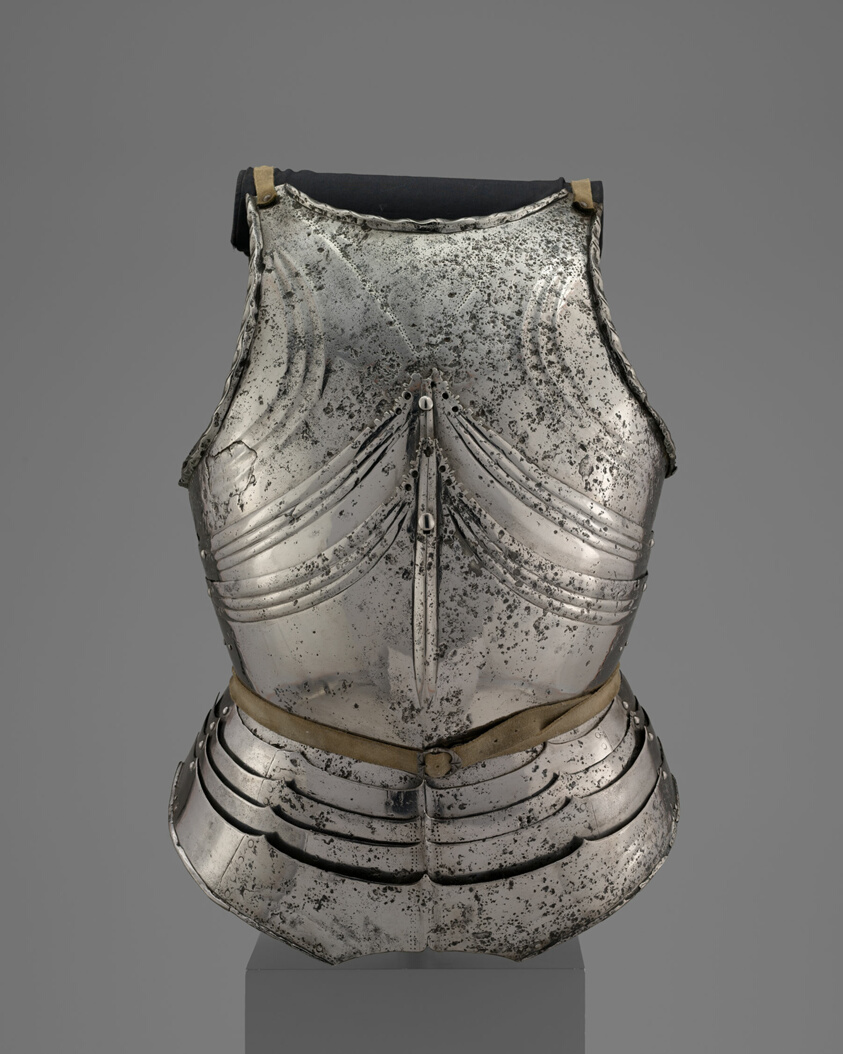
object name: Armor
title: Cuirass (Breastplate and Backplate) in the Late Gothic Style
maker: South German or Austrian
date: c. 1480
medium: Steel, brass, and leather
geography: Germany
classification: suit-element; arms and armor; armor; suit